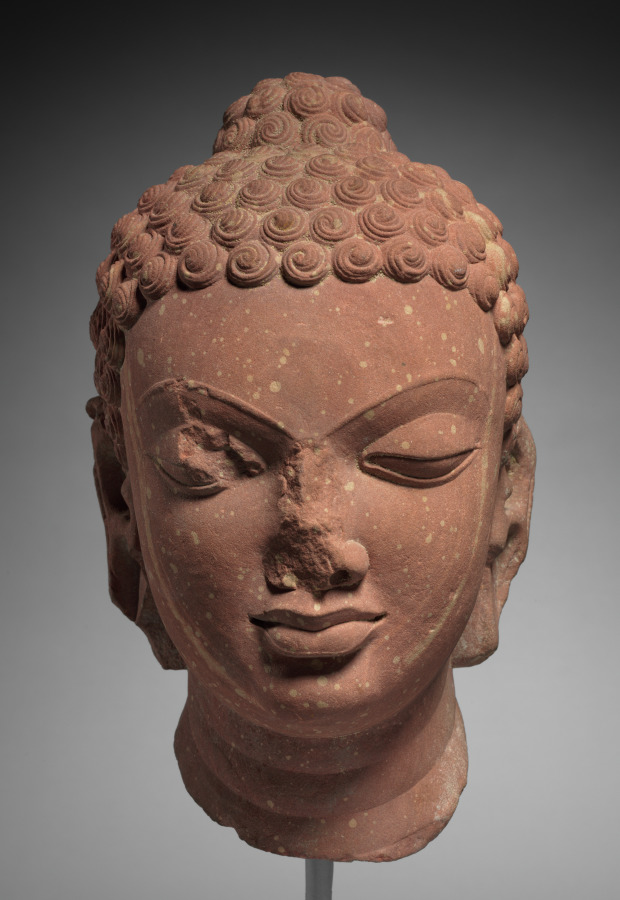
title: Head of Buddha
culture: Northern India, Uttar Pradesh, Mathura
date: 400s CE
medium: sandstone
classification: Sculpture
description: The brows arch with tension and alertness, though the lids are half closed. Short curls cover his head and cranial protuberance, which during this period came to be interpreted as a mark of one who has reached enlightenment, his state of awareness having surpassed the boundaries of an ordinary human being. Sculptors working during the time when kings of the Gupta dynasty (c. 319–550 CE) ruled northern India achieved a balance between fleshy volumes and idealized linear features. This balance led scholars to consider the Gupta period to be a “classical” age of Indian art.